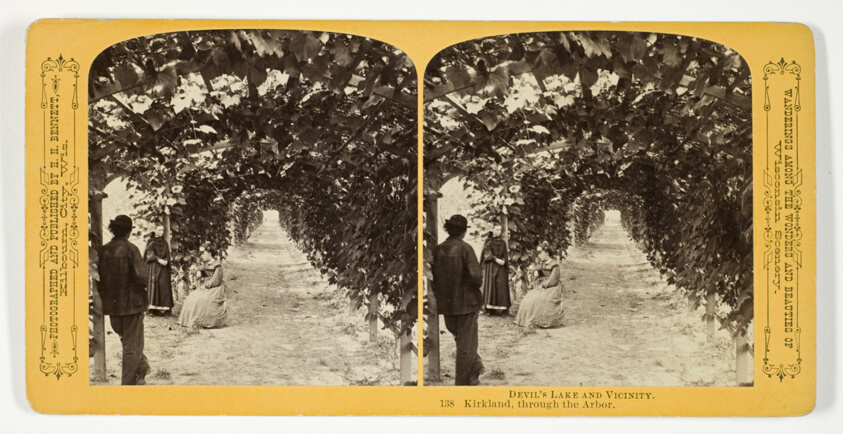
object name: Photograph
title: Kirkland, through the Arbor, No. 138 from the series "Devil's Lake and Vicinity"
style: 19th century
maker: Henry Hamilton Bennett (American, born Canada, 1843-1908)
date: 1870/1908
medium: Albumen print, stereo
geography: Wisconsin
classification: photography; photograph; albumen silver print; stereograph (albumen)